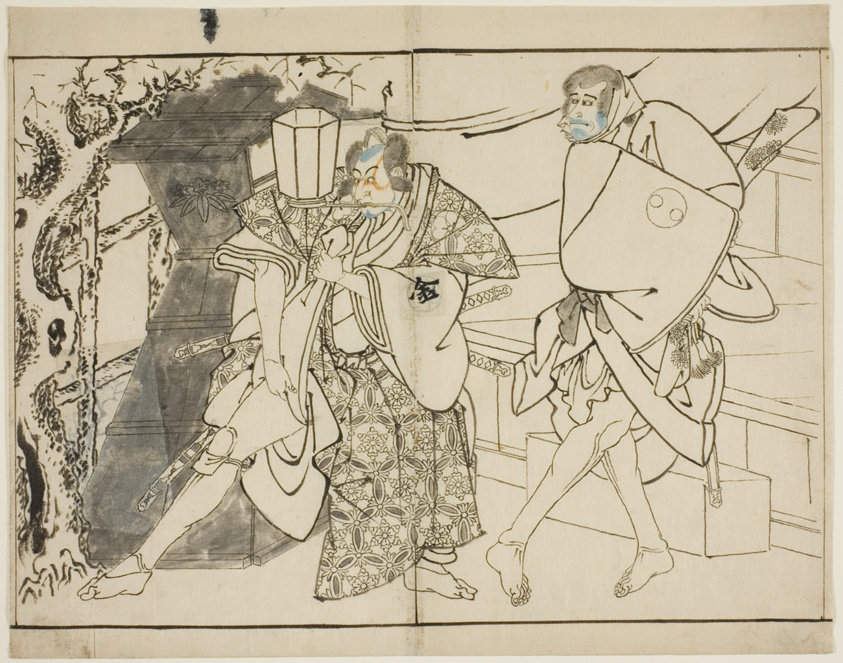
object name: Print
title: The Actors Arashi Ryuzo and Morita Kanya VIII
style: Japanese (culture or style)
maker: Toshusai Sharaku 東洲斎 写楽; Japanese, active 1794-95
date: 1794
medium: Ink and color on paper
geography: Japan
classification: woodblock print; print; asian art